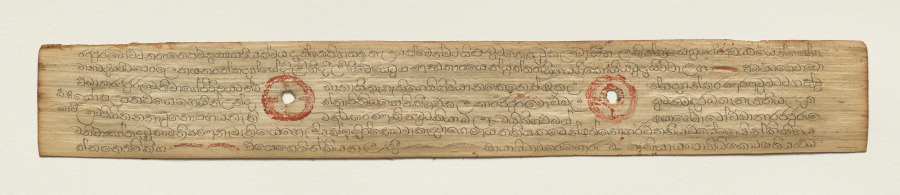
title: Leaf from a Buddhist Manuscript (recto)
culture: Sri Lanka, Singhalese, Late 17th century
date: c. 1700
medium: fiber paper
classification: Manuscript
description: Palm leaf material is still used for manuscripts in Sri Lanka. The palm leaves are prepared first by boiling them, drying them in the sun, and then rubbing them with oils. Scribes then use a metal stylus to incise the text. Then charcoal powder is wiped across the pages, filling in only the inscribed lines.